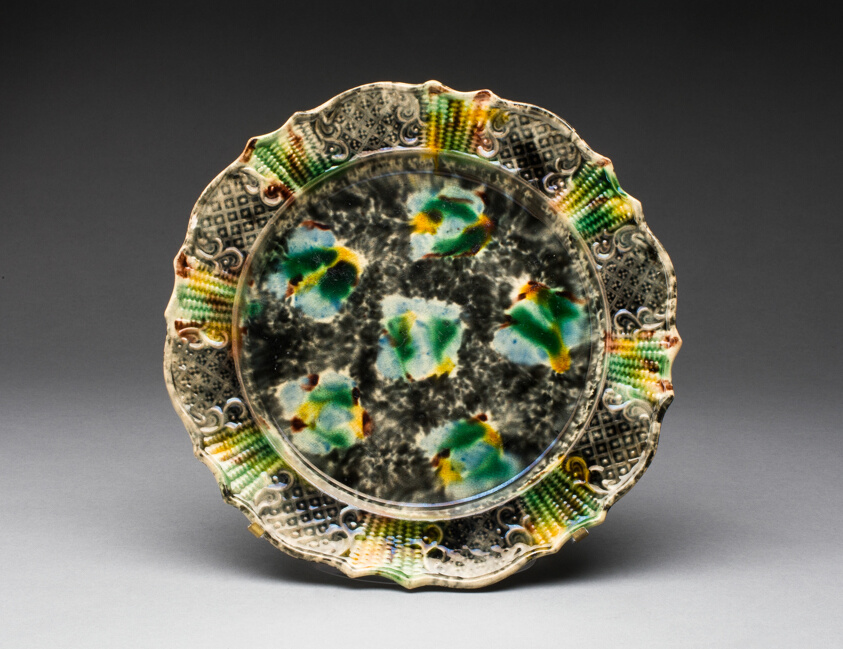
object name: Ceramics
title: Plate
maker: England, Staffordshire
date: 1760/70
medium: Lead-glazed earthenware (creamware)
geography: Staffordshire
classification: plate (general, dish); dish (vessel); ceramics; european decorative arts; creamware; earthenware; lead-glazed earthenware